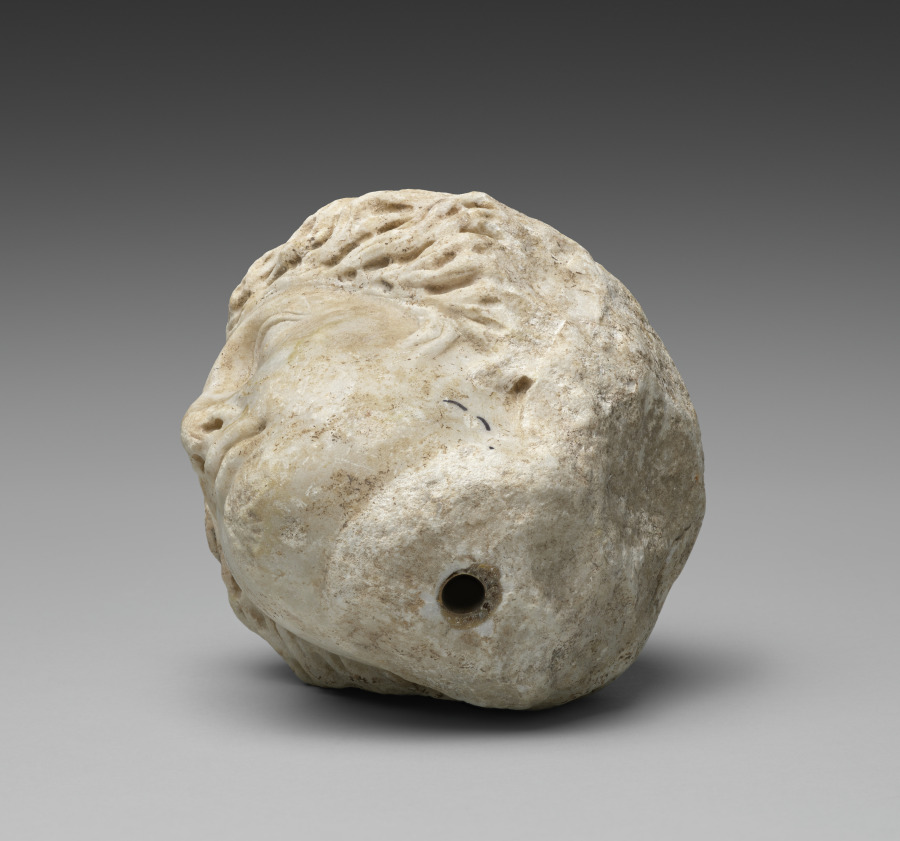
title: Head of Apollo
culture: Roman, Imperial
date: 1–200 CE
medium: marble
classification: Sculpture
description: This marble head, about three-quarter life-sized with idealized features, likely represents Apollo, the god most renowned for his youthful beauty. The hair spreads from a central part, flowing to either side in long and deeply drilled locks that cover the ears. An incised line separates these locks from a rougher area above, probably reserved for a separately made diadem or wreath, likely of metal.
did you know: This head of Apollo has also been identified as female, perhaps a Muse or other goddess.